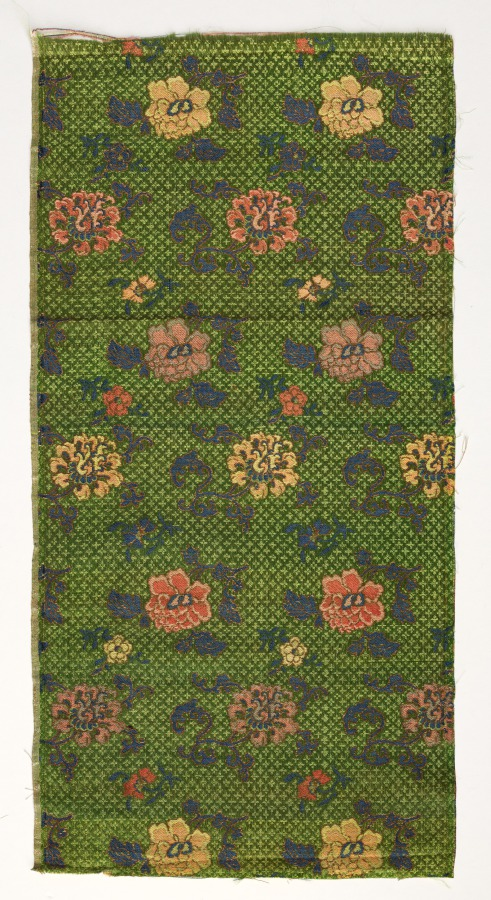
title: Fragment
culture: China, 19th century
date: 1800s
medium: silk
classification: Textile